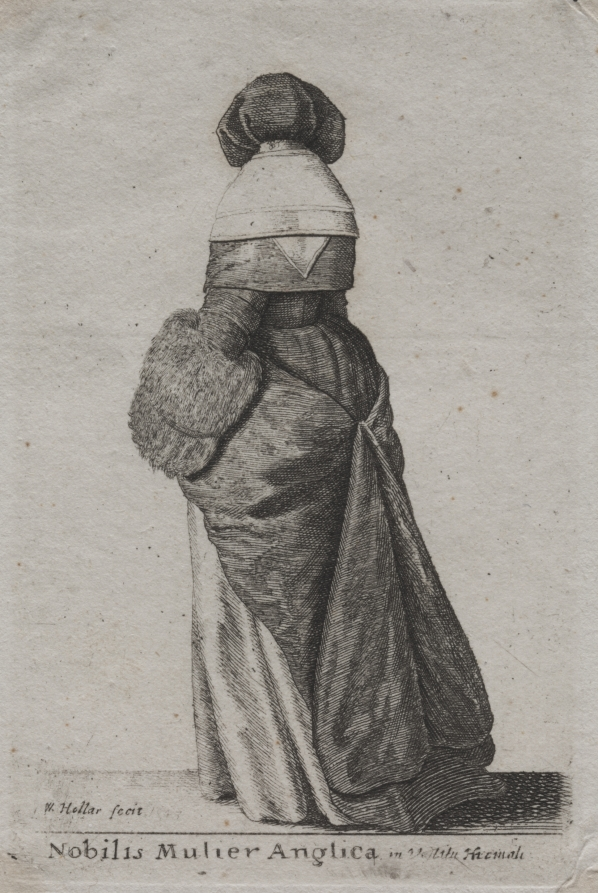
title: Nobilis Mulier Anglica in Vestitu Hiemali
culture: Bohemia, 17th century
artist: Wenceslaus Hollar (Bohemian, 1607–1677)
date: 1643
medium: etching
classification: Print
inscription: inscribed, lower left, in plate: W. Hollar fecit 1643; inscribed, lower center, in plate: Nobilis Mulier Anglica in Vestitu Hiemali